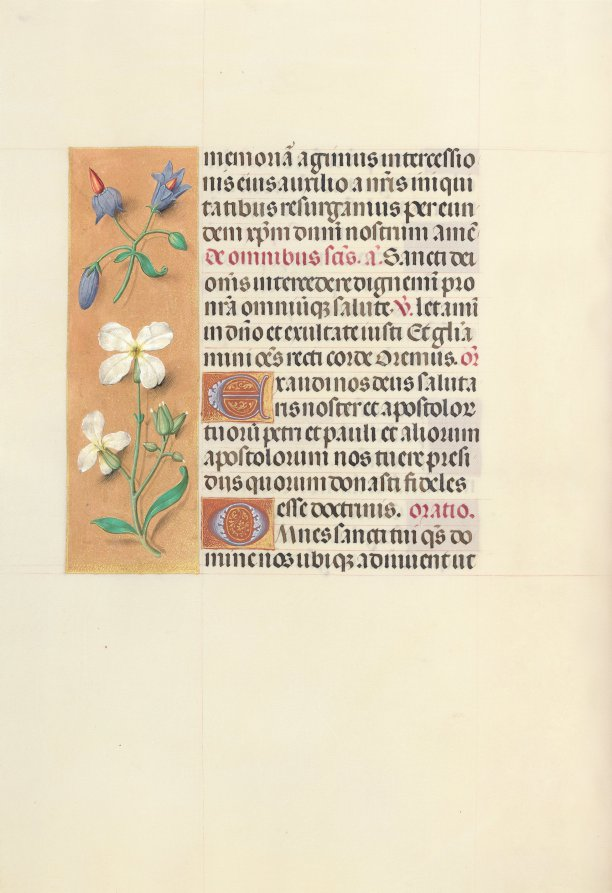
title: Hours of Queen Isabella the Catholic, Queen of Spain: Fol. 139v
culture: Flanders, Ghent and Bruges, late 15th century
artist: Master of the First Prayerbook of Maximillian (Flemish, c. 1444–1519)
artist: and Associates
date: c. 1500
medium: ink, tempera, and gold on vellum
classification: Bound Volume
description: This manuscript was illuminated by a circle of at least five highly organized manuscript painters active in the Flemish cities of Ghent and Bruges. The principal illuminator was Alexander Bening, who painted the majority of the book's miniatures. Manuscripts produced by this circle of artists are renowned for the decoration of their borders, which typically feature a rich variety of realistically-painted flowers, birds, and butterflies. This prayer book, called a book of hours, was intended not for a cleric, but for the private devotions of a lay person-in this case, Isabella the Catholic, Queen of Spain (1451-1504). Isabella's coat of arms embellishes the book's frontispiece. It is unlikely that the book was commissioned by the Queen herself; rather, she probably received it as a diplomatic gift from someone courting her patronage, perhaps Cardinal Francisco Jimenez de Cisneros. A Franciscan friar, Jimenez was dependent upon Isabella for his advancement, first to the post of Queen's confessor in 1492, and then to Archbishop of Toledo in 1495.